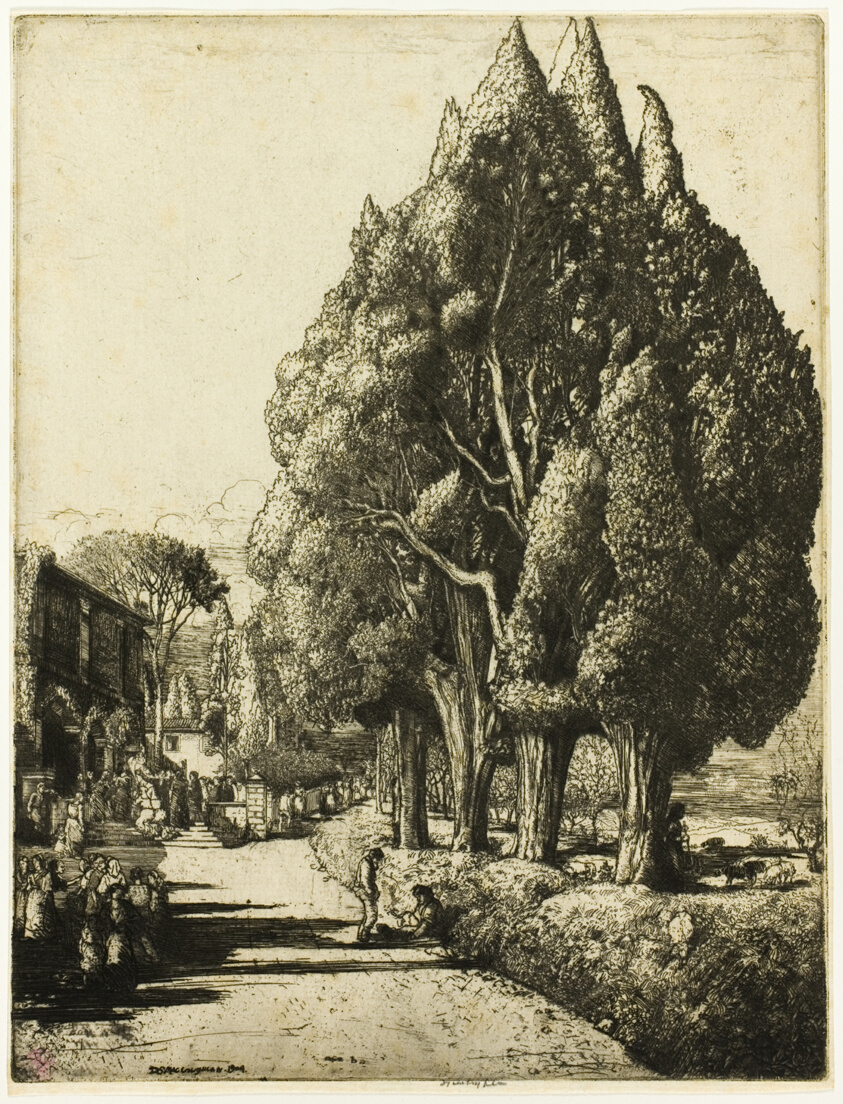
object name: Print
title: The Cypress Grove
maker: Donald Shaw MacLaughlan (American, born Canada, 1876-1938)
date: 1904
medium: Etching in black on cream laid paper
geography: United States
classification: etching; print; prints and drawing